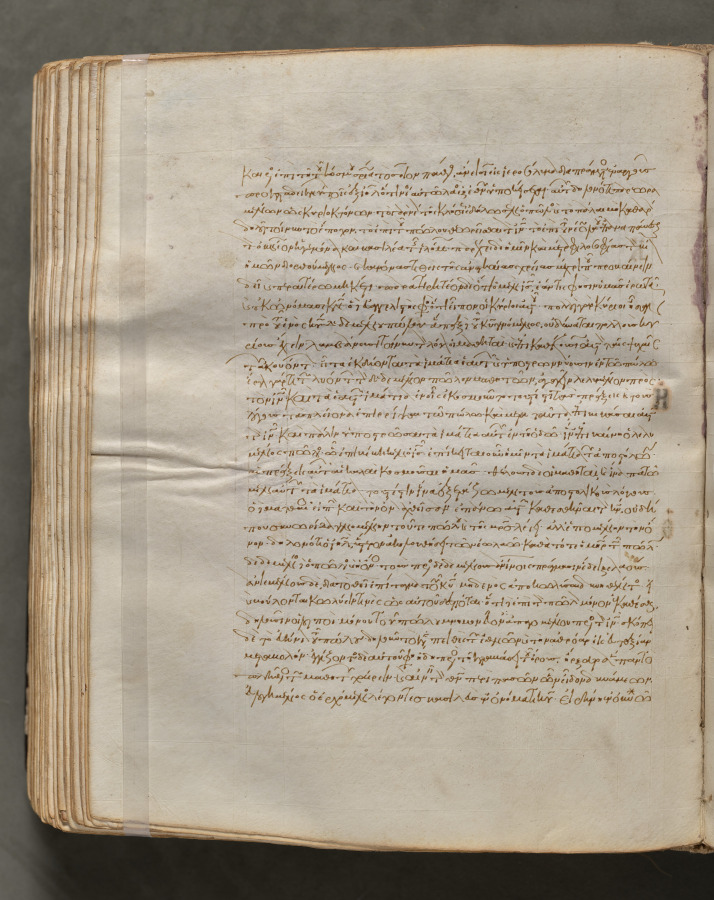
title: Text, folio 297 (verso), from a Gospel Book with Commentaries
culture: Byzantium, Constantinople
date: c. 1000–1100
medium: ink, tempera, and gold on vellum; leather binding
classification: Bound Volume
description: Each of the four gospels in this book opens on a page with brilliantly illuminated borders depicting the author of the text as well as birds—principally peacocks, symbols of the immortality of the soul—and fountains, representing the fountain of life and the salvation of the soul. This volume consists of 428 leaves with texts in Greek. Its level of sophistication suggests that it was probably written and decorated in a monastery in Constantinople.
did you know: Gospel books were carried in procession through Byzantine churches.